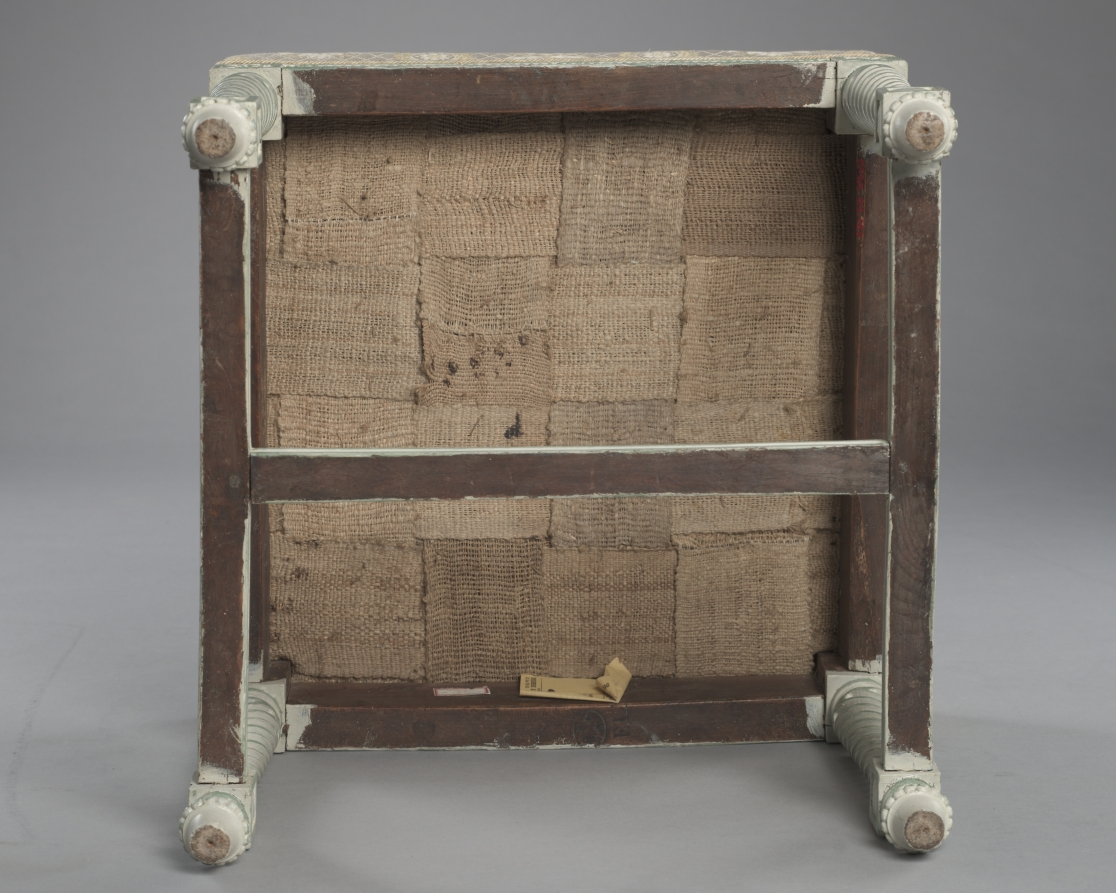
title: Stool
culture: France, Paris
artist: François-Honoré-Georges Jacob (French, 1770–1841)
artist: Georges Jacob (French, 1739–1814)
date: 1805–1813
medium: painted walnut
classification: Furniture and woodwork